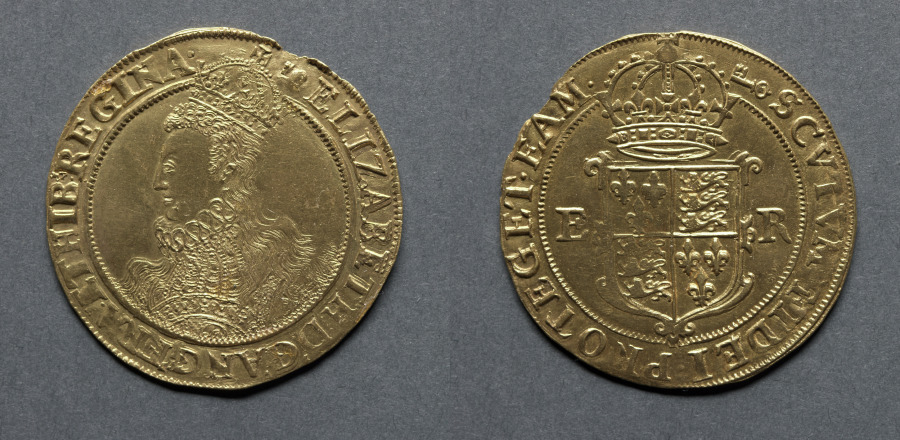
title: Pound: Elizabeth I (obverse); Crowned Shield of Arms (reverse)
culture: England, Elizabeth I, 1558-1603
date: 1595–98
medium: gold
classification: Coins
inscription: ELIZABETH D G ANG FRA ET HIB REGINA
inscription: SCVTVM FIDEI PROTEGET EAM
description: For a long time all Elizabethan gold was considered as one series, but now it is divided into three, in accordance with who was in charge of the Tower mint and in accordance with the sequence of initial marks. On the reverse the initial mark is a key and can be seen just before the start of the inscription. On the obverse is a woolpack although it is overstruck. This points to the reuse of the die.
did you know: Queen Elizabeth still appears youthful in this portrait; she wears an elaborate bejeweled dress and her long hair flows from underneath her crown.